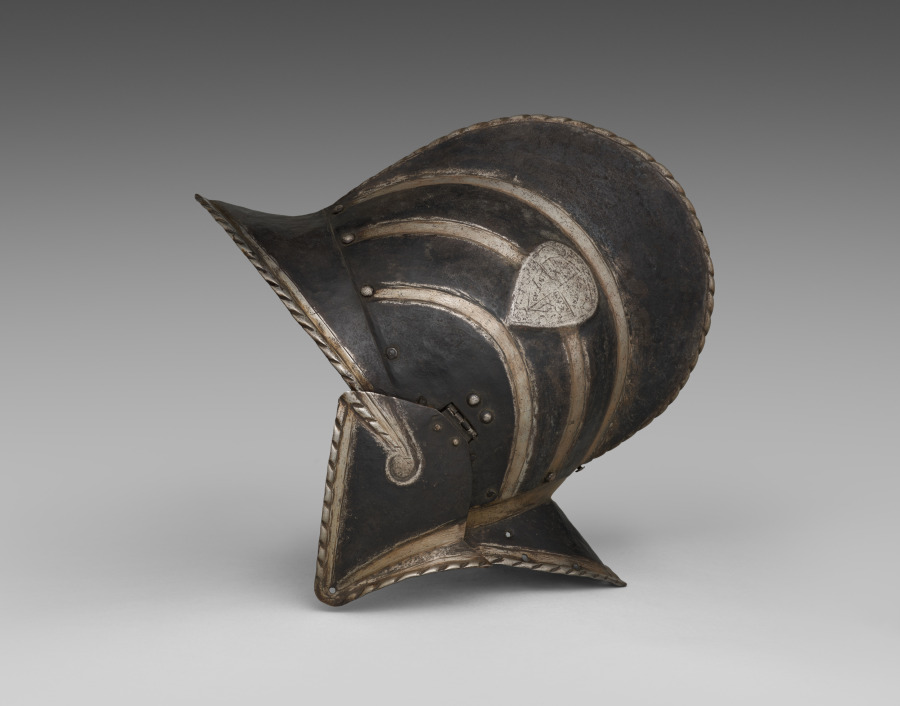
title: Black and White Burgonet (of the Civic Guard of Bologna)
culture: Italy, late 16th Century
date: c. 1580–1600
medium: steel with black paint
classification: Arms and Armor